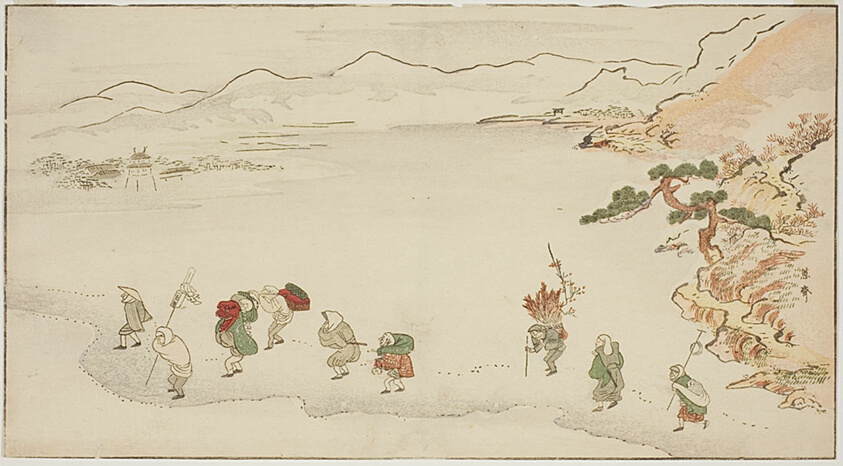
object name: Print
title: Snowy Landscape with Strollers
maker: Kitao Masayoshi (Kuwagata Keisai) (Japanese, 1764-1824)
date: 1790s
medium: Color woodblock print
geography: Japan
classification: woodblock print; print; asian art